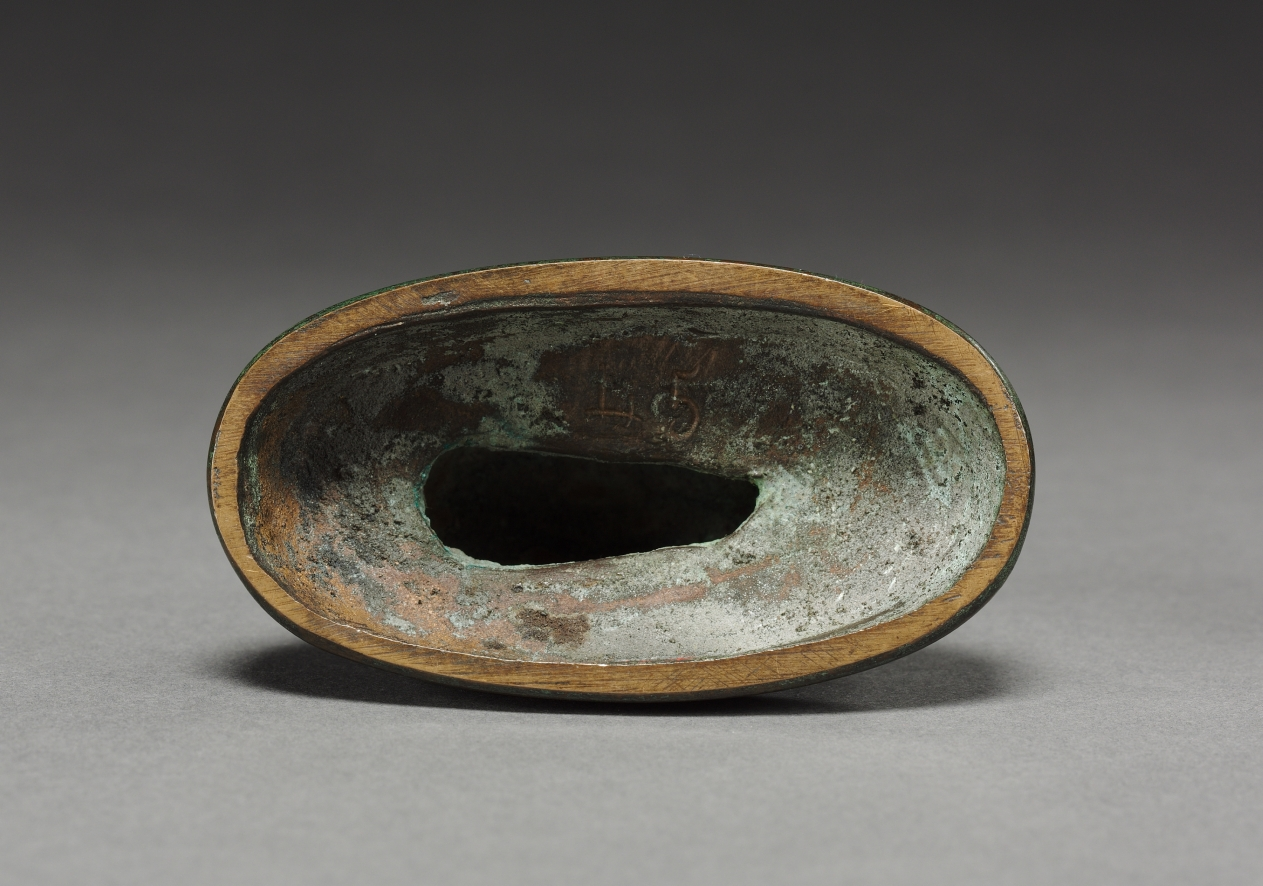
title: Hare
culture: France, 19th century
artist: Antoine-Louis Barye (French, 1796–1875)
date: c. 1830 – 1875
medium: bronze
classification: Sculpture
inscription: Signed on base top rear: "Barye"